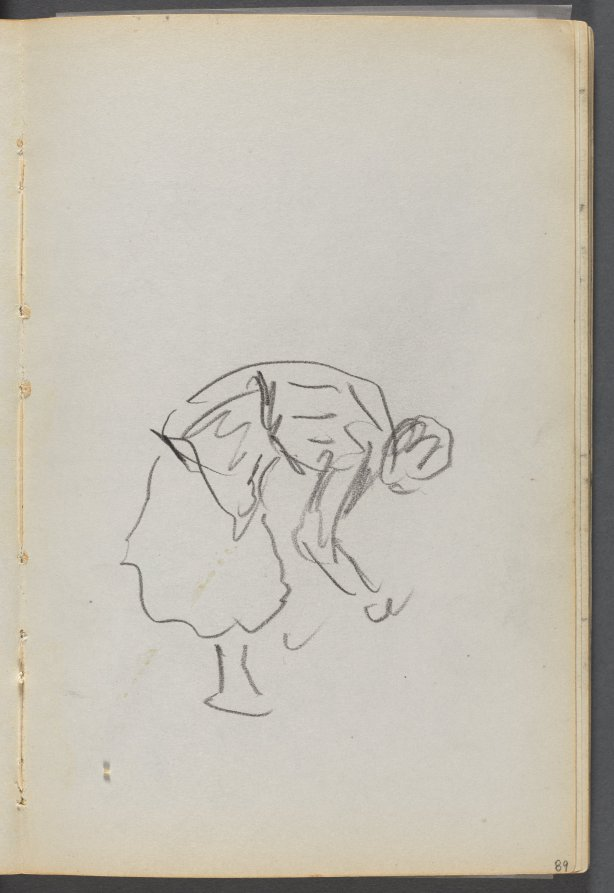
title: Sketchbook, The Dells, N° 127, page 089: Bending Figure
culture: America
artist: Maurice Prendergast (American, born Newfoundland [now Canada], 1858–1924)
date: c. 1919–1921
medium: graphite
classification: Bound Volume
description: This sketchbook contains 59 pages of graphite drawings and 16 watercolors made at various locations on Cape Ann, Massachusetts.